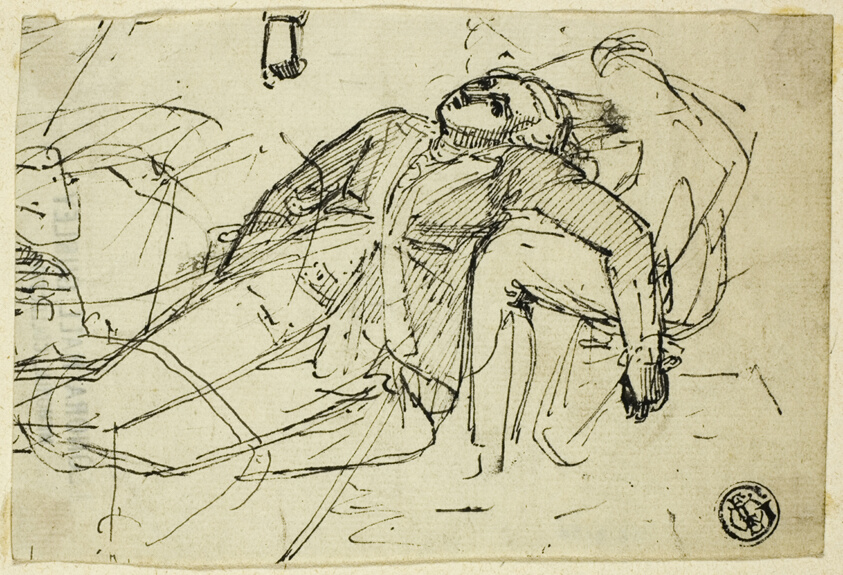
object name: Drawing and Watercolor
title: The Death of General Wolfe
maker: Attributed to Benjamin West; American, 1738-1820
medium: Pen and black ink on ivory laid paper, tipped onto ivory wove paper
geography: United States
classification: pen and ink drawings; drawings (visual works); prints and drawing